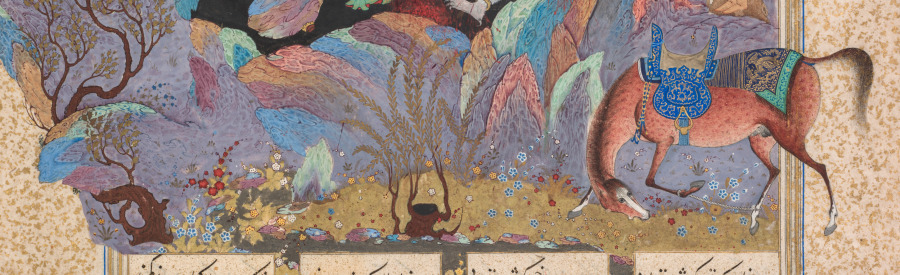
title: Rustam's seventh course: He kills the White Div, folio 124 from a Shah-nama (Book of Kings) of Firdausi (Persian, about 934–1020)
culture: Iran, Tabriz, Safavid period (1501-1722)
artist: attributed to Abd al-Vahhab (Persian, active about 1516)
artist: attributed to Mir Musavvir (Iranian, c. 1510–1555)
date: 1522–37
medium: Gum tempera, ink, gold, and silver on paper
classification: Manuscript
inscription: Script: Nasta'liq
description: The legendary hero Rustam brutally takes the demon chief’s liver blood, needed to cure his king of blindness. Paintings from the Shah-nama made for the Persian ruler Shah Tahmasp (reigned 1524–76) were acclaimed in their day for their brilliant coloring and refinement. Seven of the artists who contributed to this book moved to India to lead the new Mughal painting workshop in the 1550s. They introduced to the Indian artists a more complex color sensibility and preference for presenting faces in three-quarter view, as opposed to in profile.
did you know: Devils in the details: three peer into the White Div’s lair by the Caspian Sea.